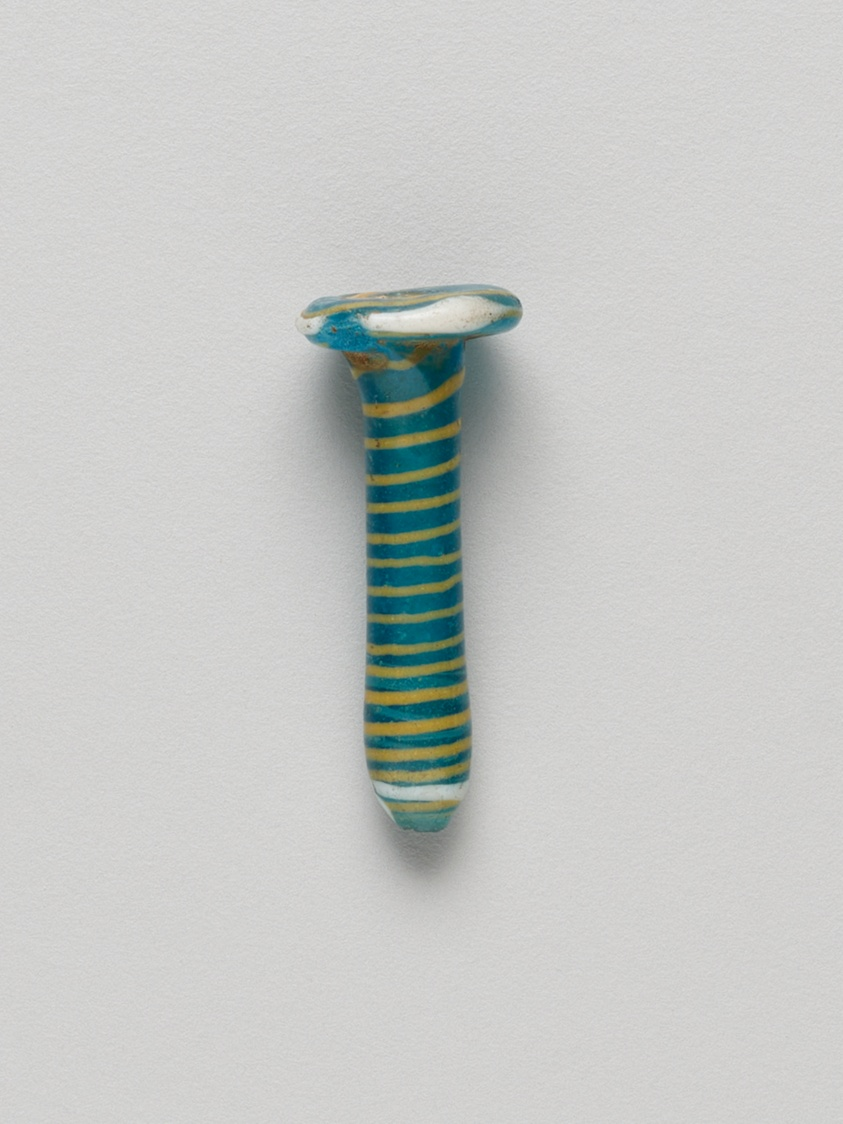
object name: Costume and Accessories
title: Ear Stud or Bead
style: eighteenth dynasty, new kingdom, ancient, egyptian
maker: Egyptian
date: New Kingdom, mid–Dynasty 18–19, about 1390–1186 BCE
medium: Glass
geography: Egypt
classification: glass; jewelry; amulet; ancient art; costume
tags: decoration